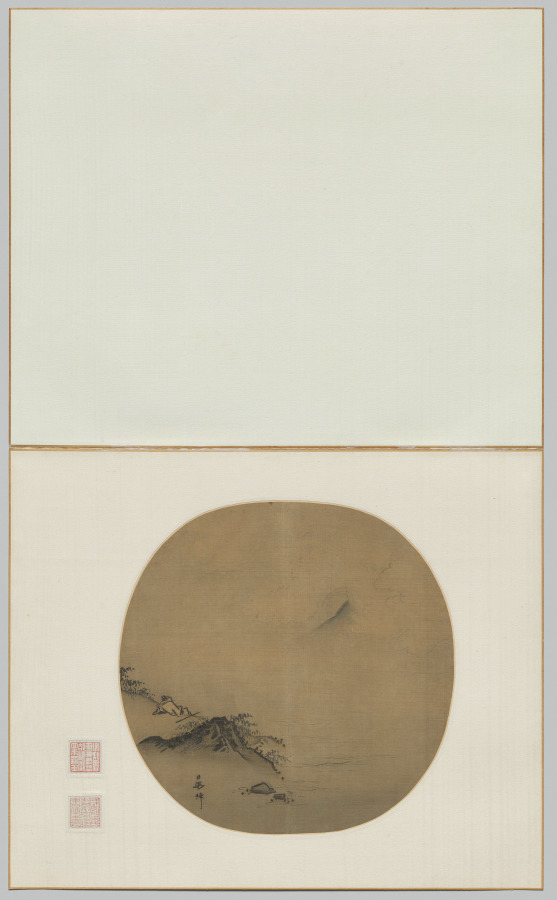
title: Scholar Reclining and Watching Rising Clouds, Poem by Wang Wei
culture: China, Southern Song dynasty (1127-1279)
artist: Ma Lin (Chinese, c. 1185–after 1260)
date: c. 1256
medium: Album leaf; ink on silk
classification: Painting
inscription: 臣馬麟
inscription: 2 seals on mounting of Chu Sheng-chai (20th c.).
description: Poem and painting, once mounted together as one fan, exemplify the collaboration between imperial patron and court painter. Emperor Lizong’s calligraphy cites a verse from Wang Wei’s (701–761) poem, Walking to where the water ends, I sit and watch when clouds arise. Ma Lin’s response is this painting. At the water’s edge, a scholar reclines by a large rock. The view leads across the empty middle ground to a distant mountain. With sparse ink and subtly graded washes, Ma Lin visualizes the poetic verse. The painting suggests the impact of Chan aesthetics through interaction between the palace, literati-officials, and monasteries around Hangzhou.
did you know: Ma Lin was the son of Ma Yuan, the artist renowned for his unique composition and often referred to as "One-corner Ma."